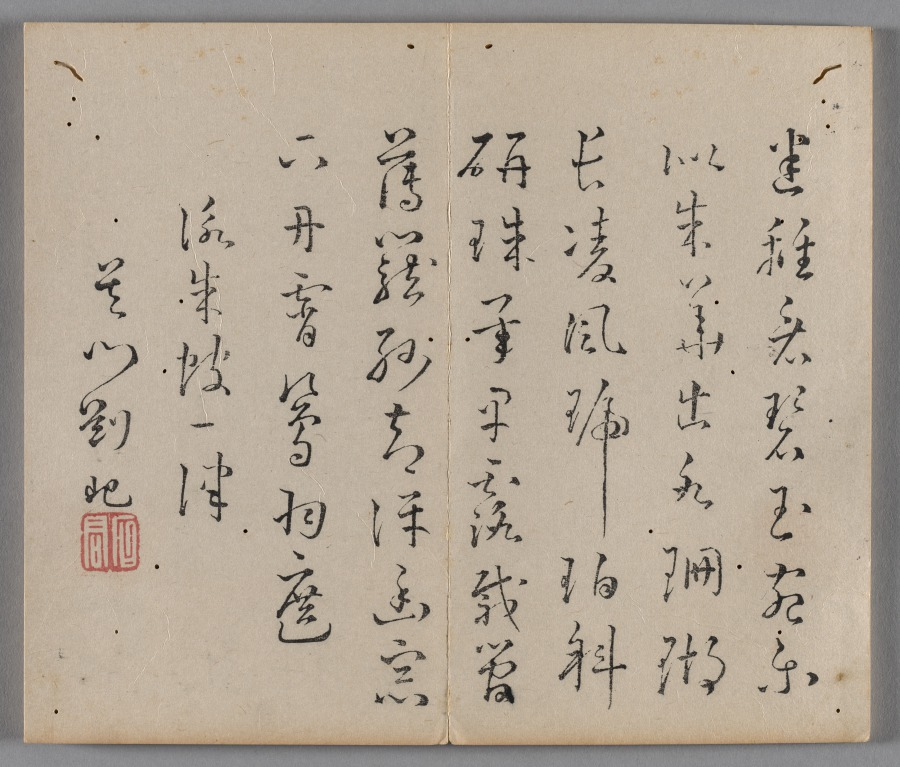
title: Ten Bamboo Studio Painting and Calligraphy Handbook (Shizhuzhai shuhua pu): Bamboo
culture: China, Qing dynasty (1644-1911)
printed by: Hu Zhengyan (Chinese, c. 1584–1674)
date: 1633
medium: Woodblock-printed book; ink and colors on paper; first edition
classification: Print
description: Color printing reached a level of perfection in the early 1600s, as seen in this Ten Bamboo Studio Collection of Calligraphy and Painting and the Mustard Seed Garden Manual of Painting (printed 1679 and 1701). The painterly quality, precision in registering (aligning) the woodblocks, and harmonious colors made them the most successful color print editions in Chinese history. Both editions were printed and compiled in Nanjing, spread nationwide, and had a great impact on the arts in Japan and Korea.